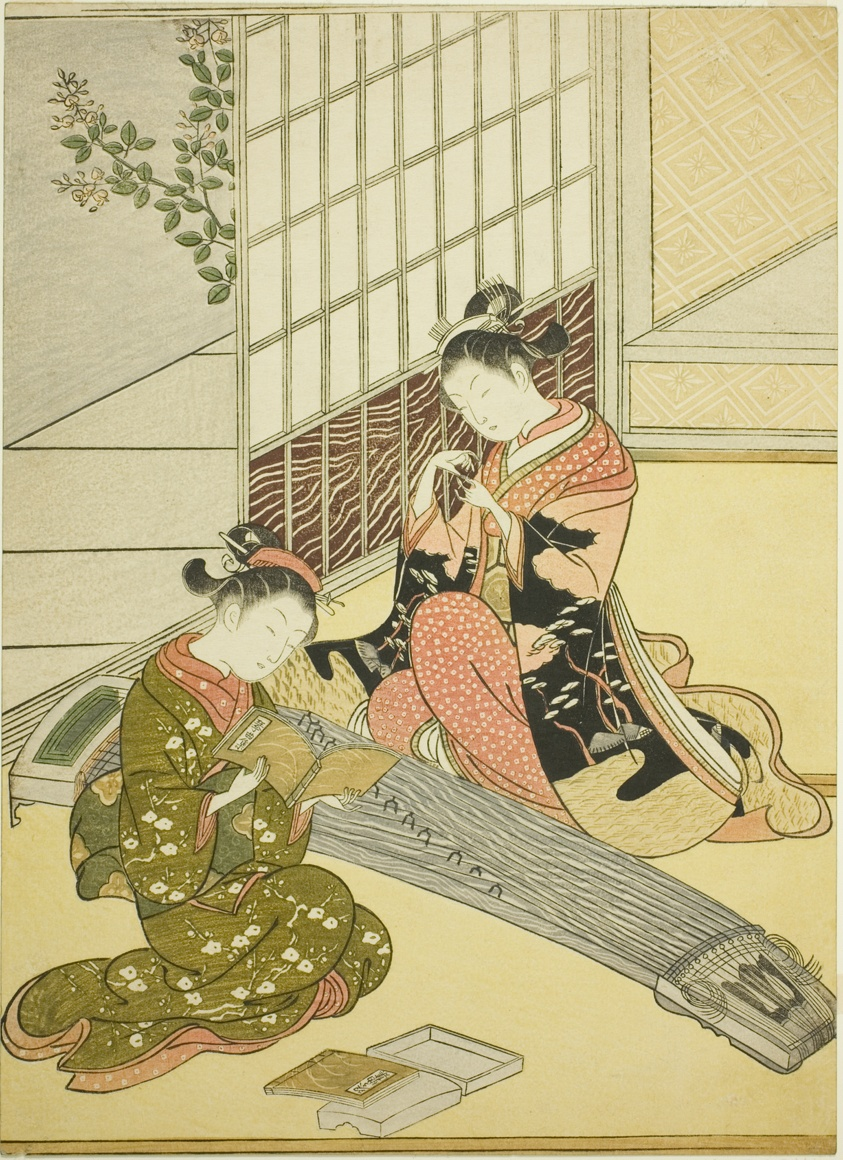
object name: Print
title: Descending Geese of the Koto Bridges (Kotoji no rakugan), from the series "Eight Views of the Parlor (Zashiki hakkei)"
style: Japanese (culture or style)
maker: Suzuki Harunobu 鈴木 春信; Japanese, 1725 (?)-1770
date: c. 1766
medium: Color woodblock print; chuban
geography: Japan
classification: woodblock print; print; asian art